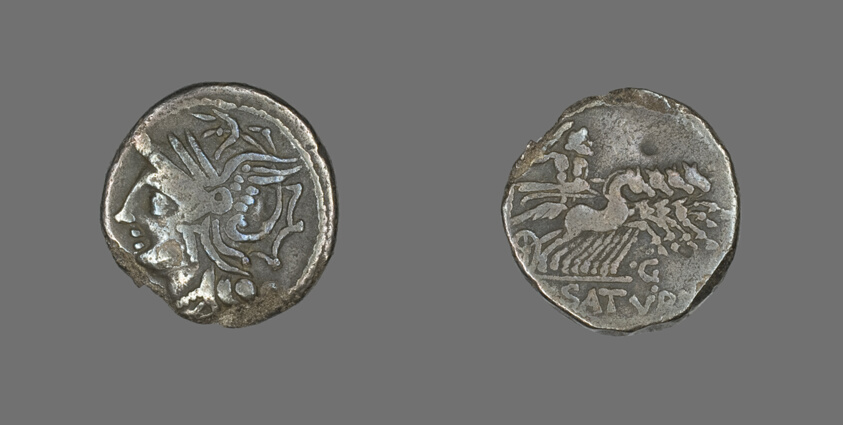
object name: Coin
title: Denarius (Coin) Depicting the Goddess Roma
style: roman (ancient, style or period), ancient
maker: Roman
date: 104 BCE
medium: Silver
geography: Roman Empire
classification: coin; ancient art